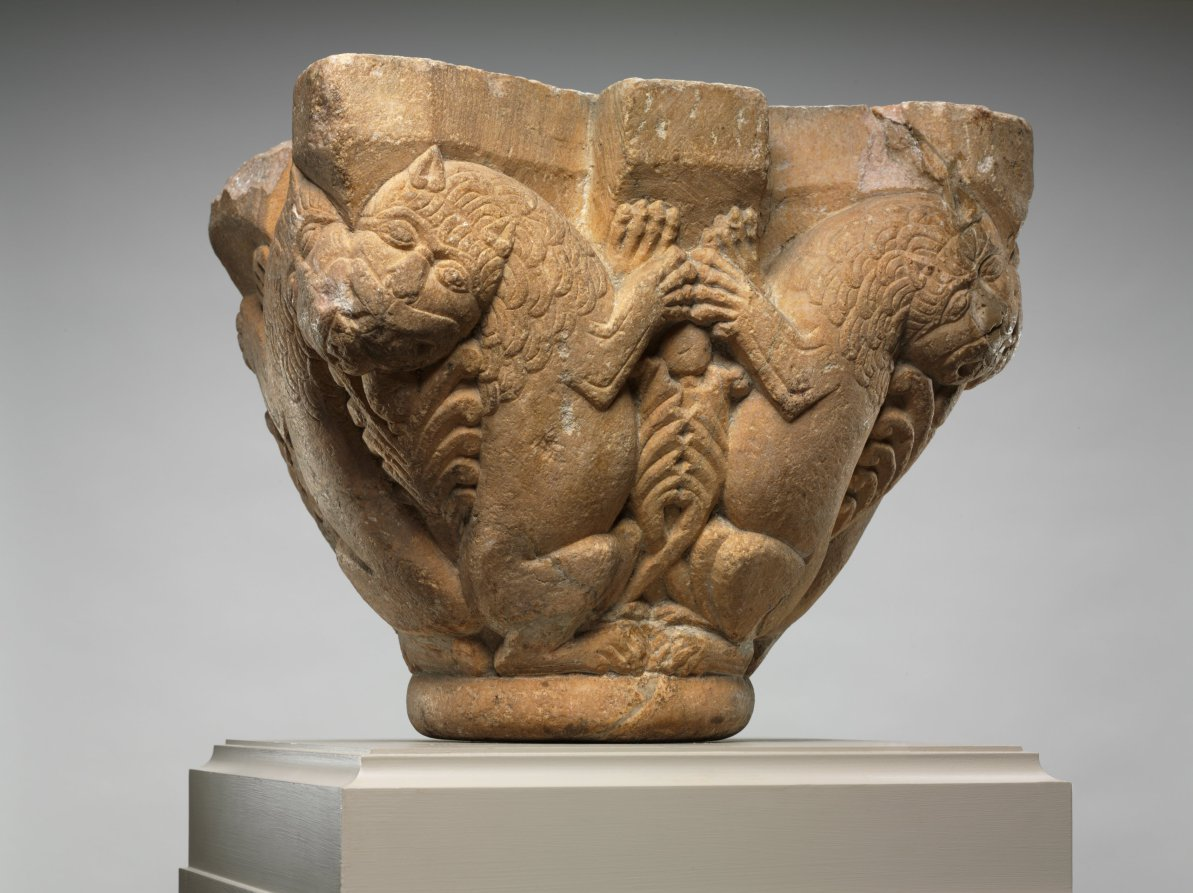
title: Engaged Capital with Lions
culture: Northern Spain (Navarre ?) or Southwest France (Pyrénées or Roussillon ?), mid-12th century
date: 1145–64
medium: marble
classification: Sculpture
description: The compositional motif of confronted and addorsed beasts illustrated on this capital was especially popular in churches along the pilgrimage roads.